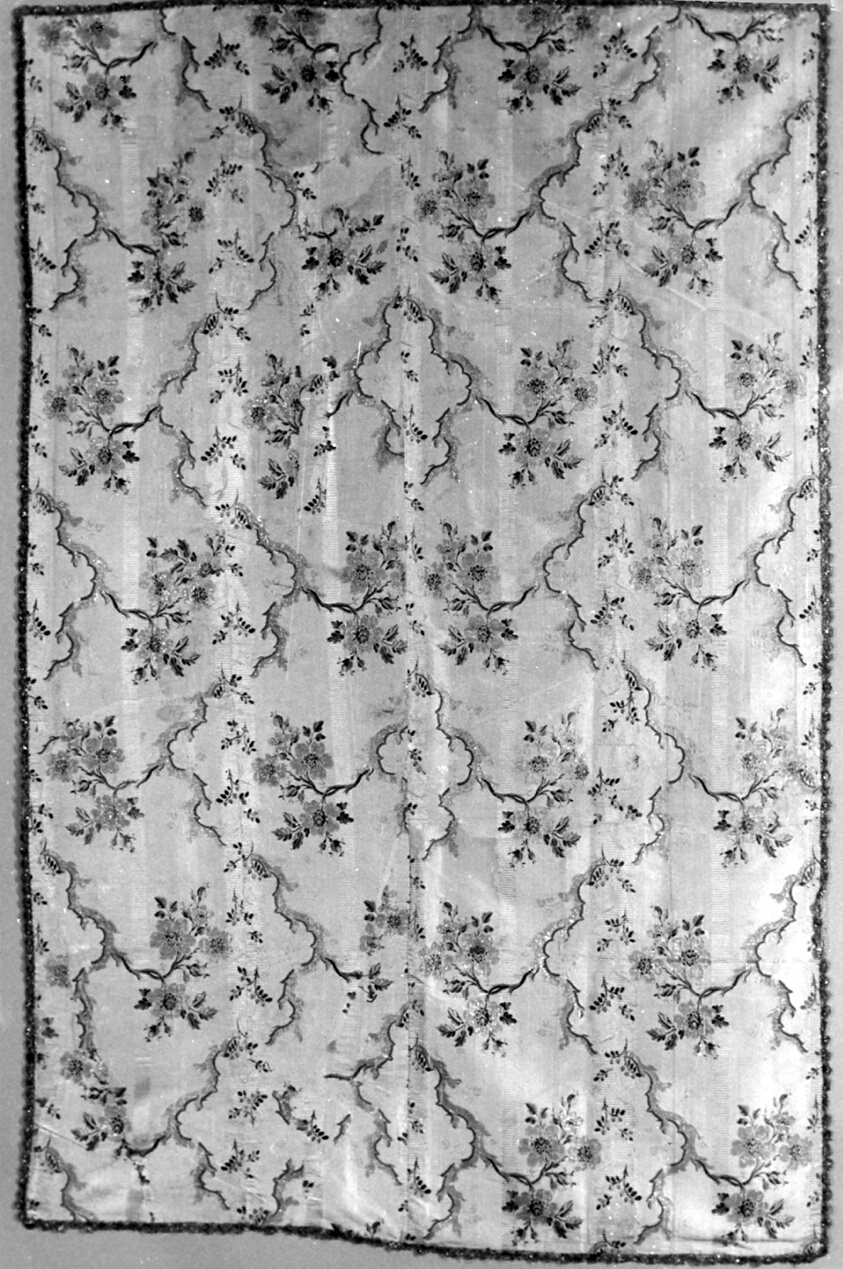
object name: Textile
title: Panel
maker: France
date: 18th century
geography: France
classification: textile; weaving